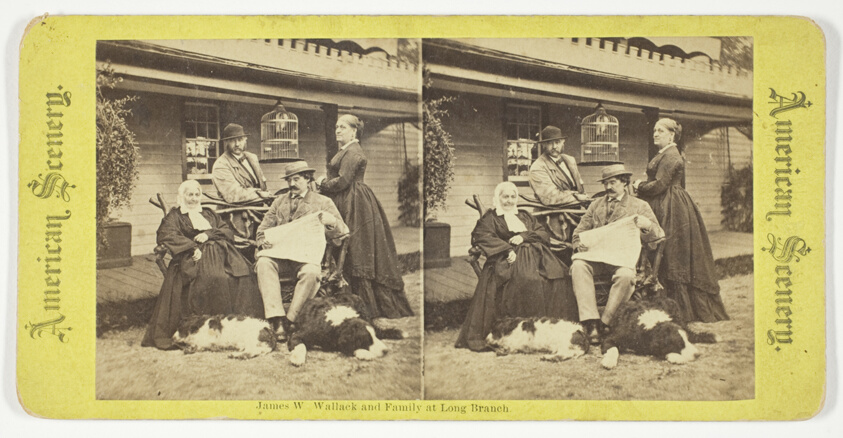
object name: Photograph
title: James W Wallack and Family at Long Branch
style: 19th century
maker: Artist unknown; American, late 19th century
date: 1875/99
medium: Albumen print, stereo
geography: Long Branch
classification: photography; photograph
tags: dogs, animals